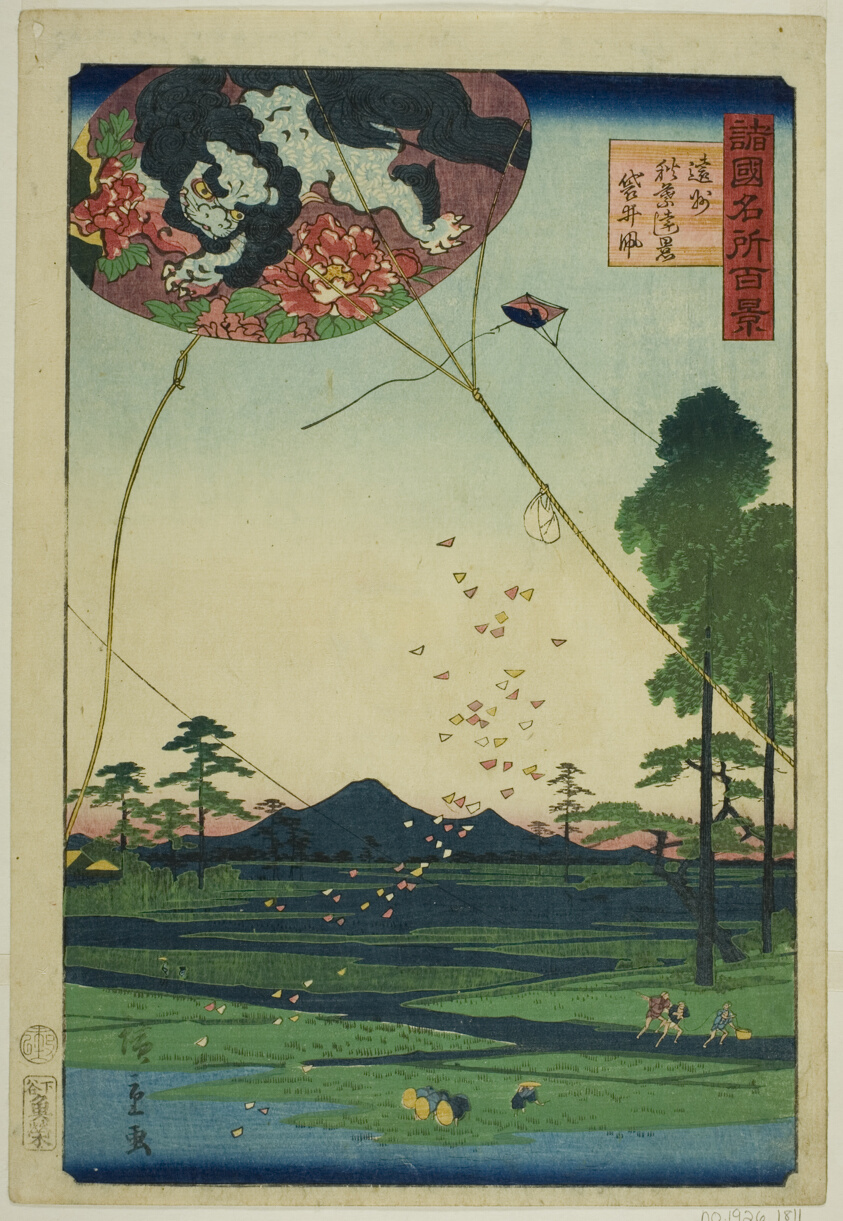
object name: Print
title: Kites of Fukuroi and Distant View of Akiba in Totomi Province (Enshu Akiba enkei Fukuroi tako), from the series "One Hundred Famous Views in the Various Provinces (Shokoku meisho hyakkei)"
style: Japanese (culture or style)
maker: Utagawa Hiroshige II (Shigenobu) (Japanese, 1826-1869)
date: 1859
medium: Color woodblock print; oban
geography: Japan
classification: woodblock print; print; asian art